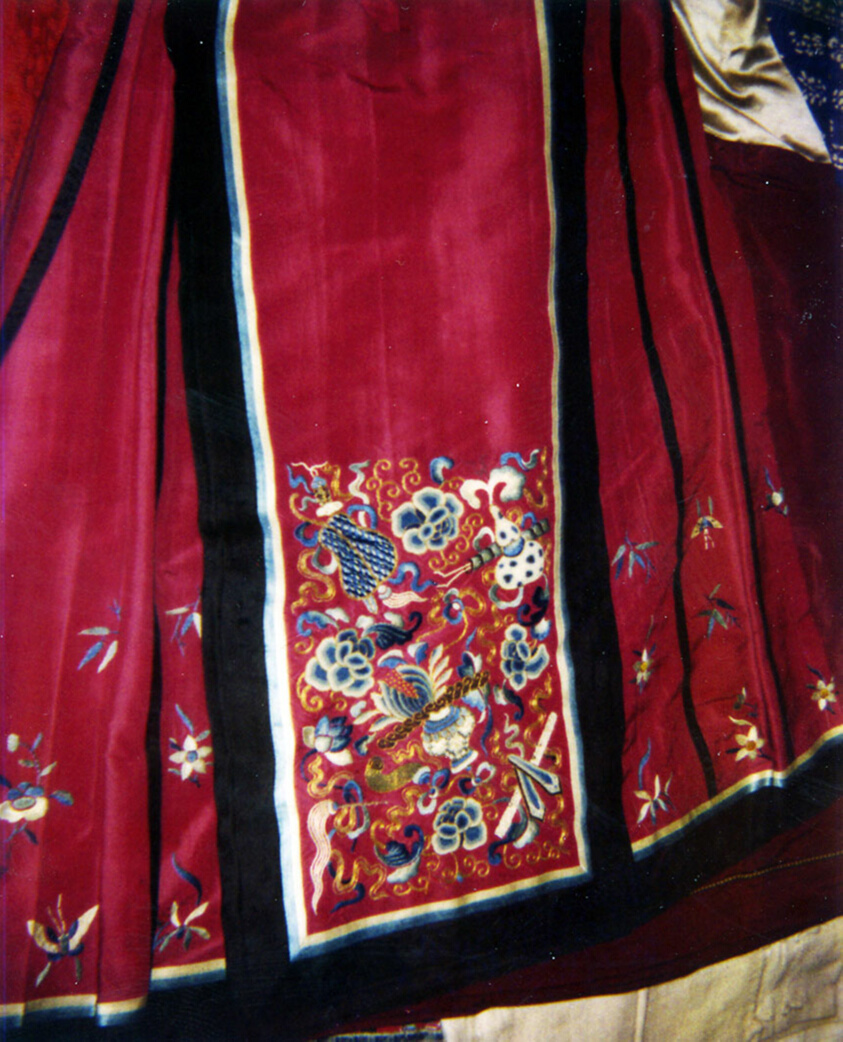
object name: Costume and Accessories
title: Woman's Qun (Skirt)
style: qing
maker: Han-Chinese (China)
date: 1880/90, Qing dynasty (1644–1911)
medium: Silk, plain weave; embroidered with silk and gold-leaf-over-lacquered-paper-strip-wrapped silk in knot, satin and stem stitches; laid work and couching; edged with warp-float faced 4:1 and 7:1 satin weaves; waist band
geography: China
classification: textile; needlework (visual works); weaving; costume